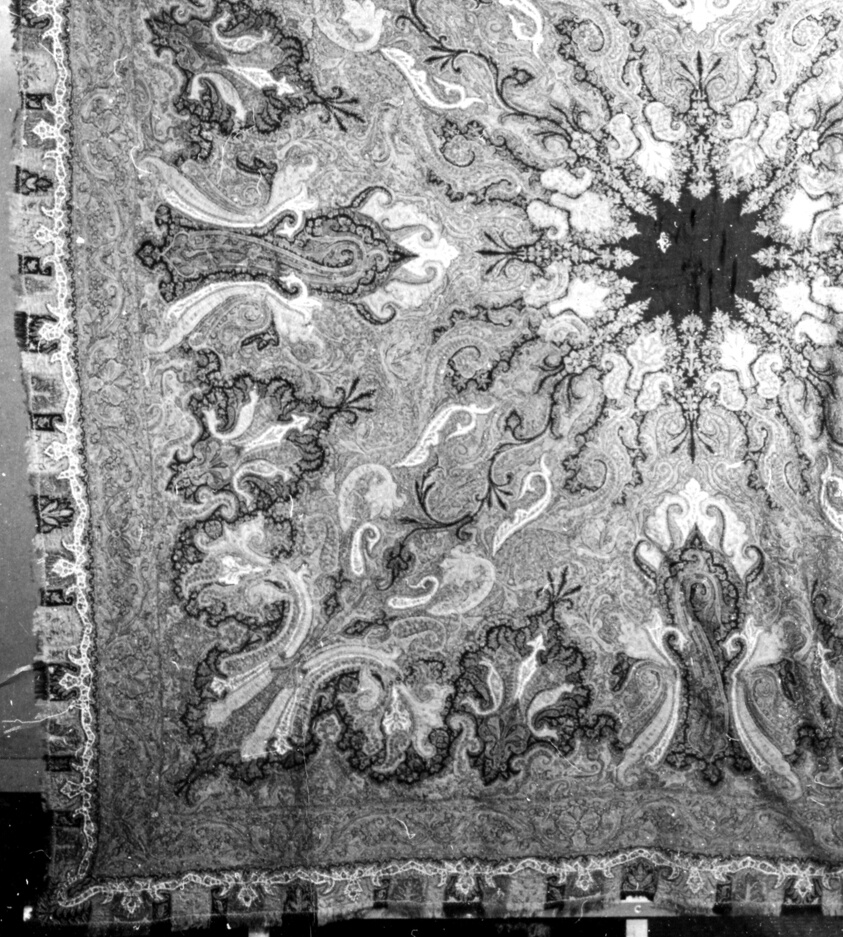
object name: Costume and Accessories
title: Shawl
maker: India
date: 1860s/70s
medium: Interlocking twill weave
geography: India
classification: textile; weaving; costume; dress (garment); clothing